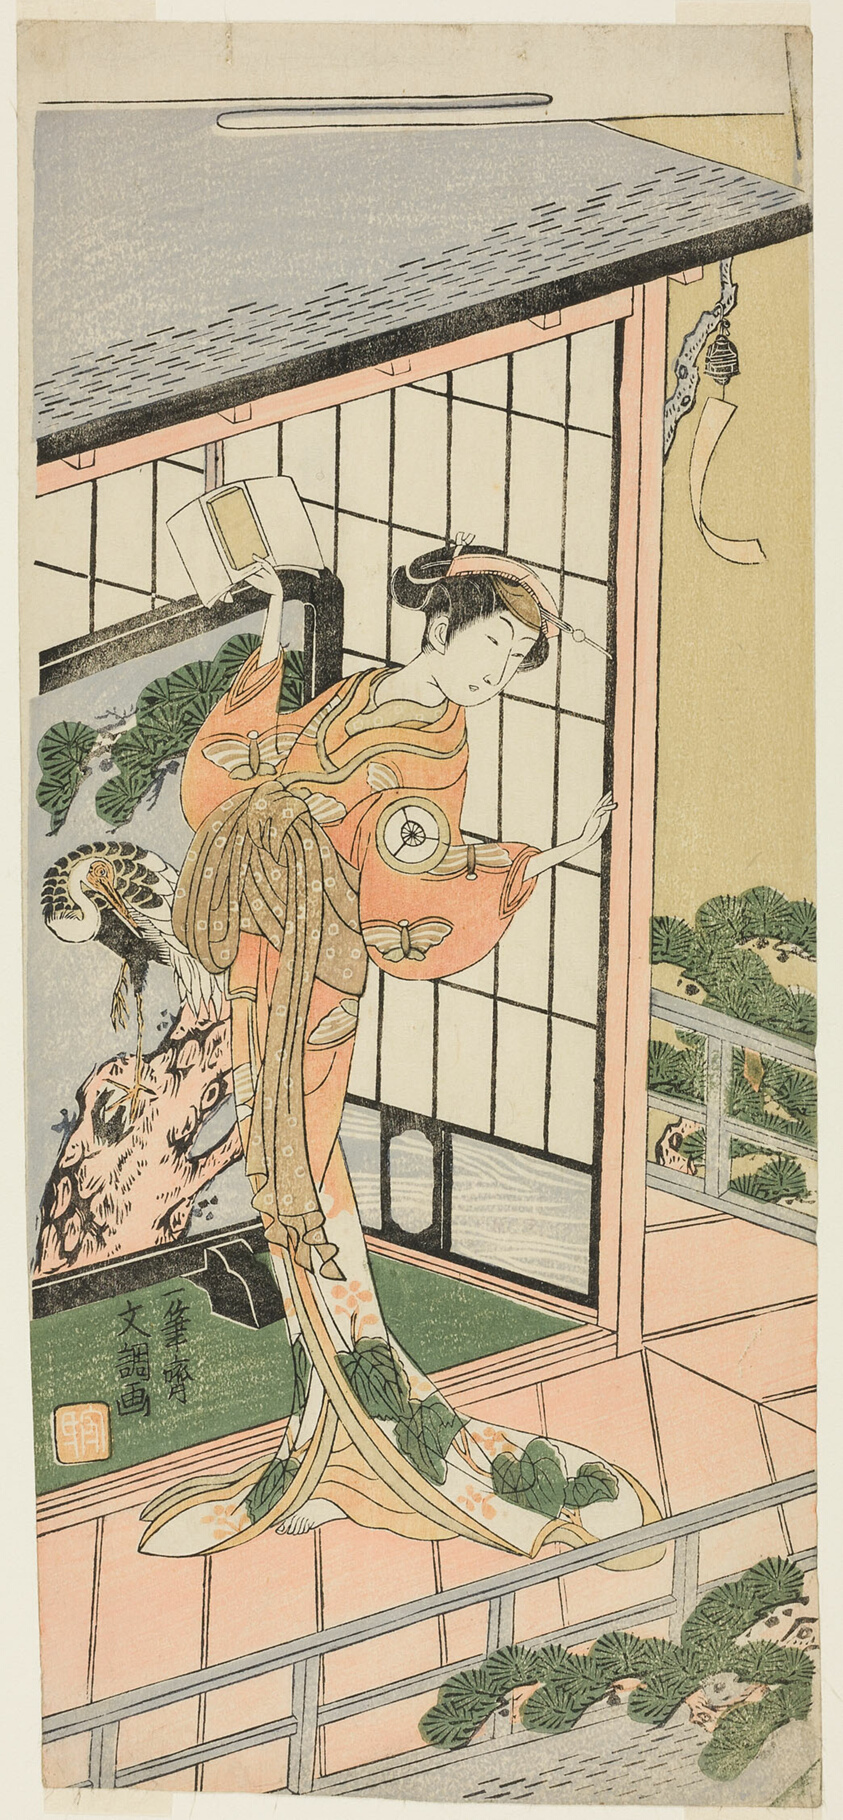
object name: Print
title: The Actor Iwai Hanshiro IV as Okaru in Act Seven of the Play Chushingura (Treasury of the Forty-seven Loyal Retainers), Performed at the Morita Theater from the Third Day of the Fourth Month, 1769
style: Japanese (culture or style)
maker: Ippitsusai Buncho (Japanese, active c. 1755-90)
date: c. 1769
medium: Color woodblock print; hosoban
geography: Japan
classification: woodblock print; print; asian art